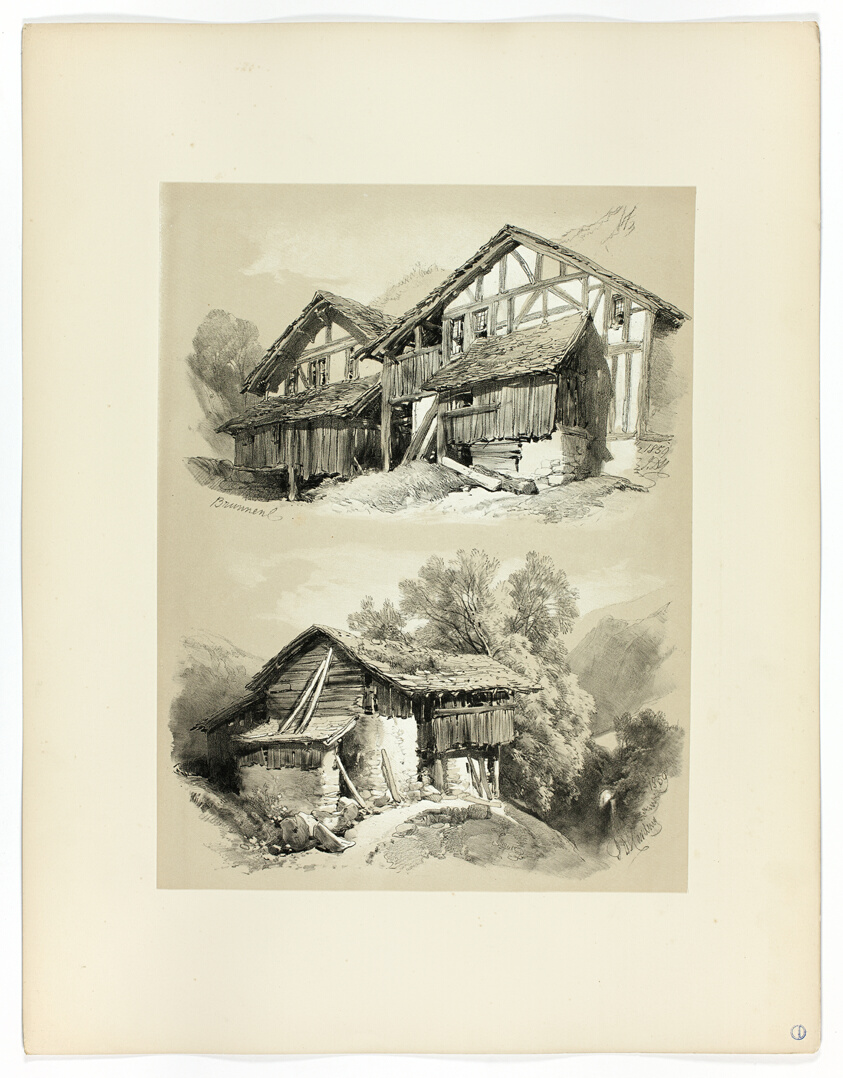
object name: Print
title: Brunnen, from Picturesque Selections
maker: James Duffield Harding, (English, 1798-1863); Published by W. Kent and Co.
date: 1859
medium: Lithograph on paper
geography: England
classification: lithograph; print; prints and drawing